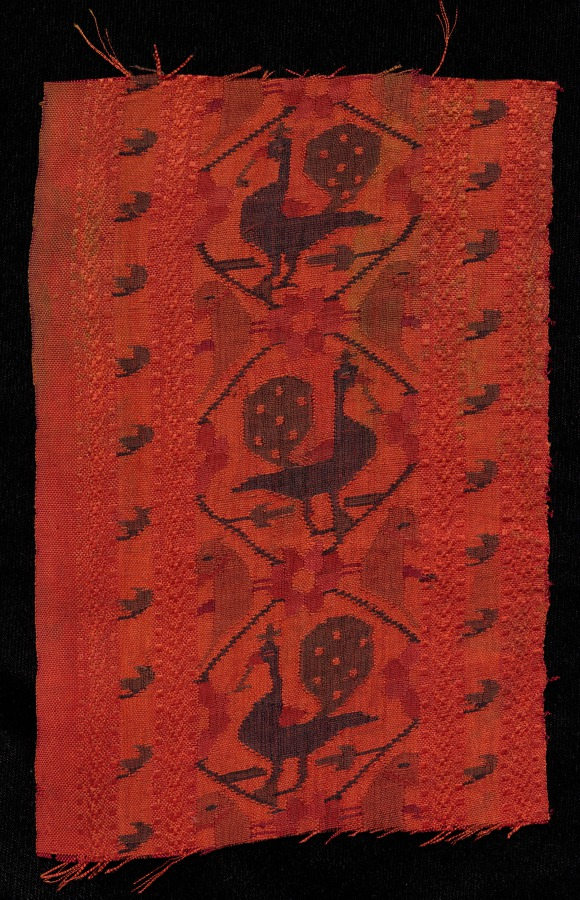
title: Border with Peacock Design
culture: India, Northern, 17th century (?)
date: 1600s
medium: woven silk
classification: Textile